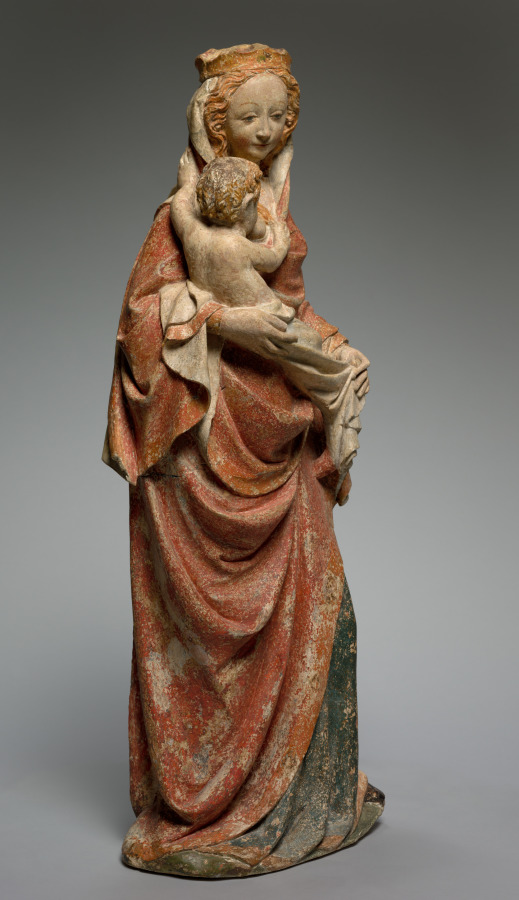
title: Virgin Nursing the Christ Child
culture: France, Île de France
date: c. 1370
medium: painted limestone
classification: Sculpture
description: This sculpture of the Virgin Mary nursing the Christ child subtly emphasizes the intimate relationship between mother and child and brings the Son of God in his human existence closer to the viewer. The emotional interaction is characteristic of sculpture since the mid-1300s, especially in the circles close to the court of the French kings in Paris and Emperor Charles IV (reigned 1346–78) in Prague. These novel stylistic tendencies were possibly a reaction to the fear and uncertainty incurred by the first great plague wave in 1348.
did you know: The back of this sculpture is unfinished since it would have originally been placed against a wall or pier.